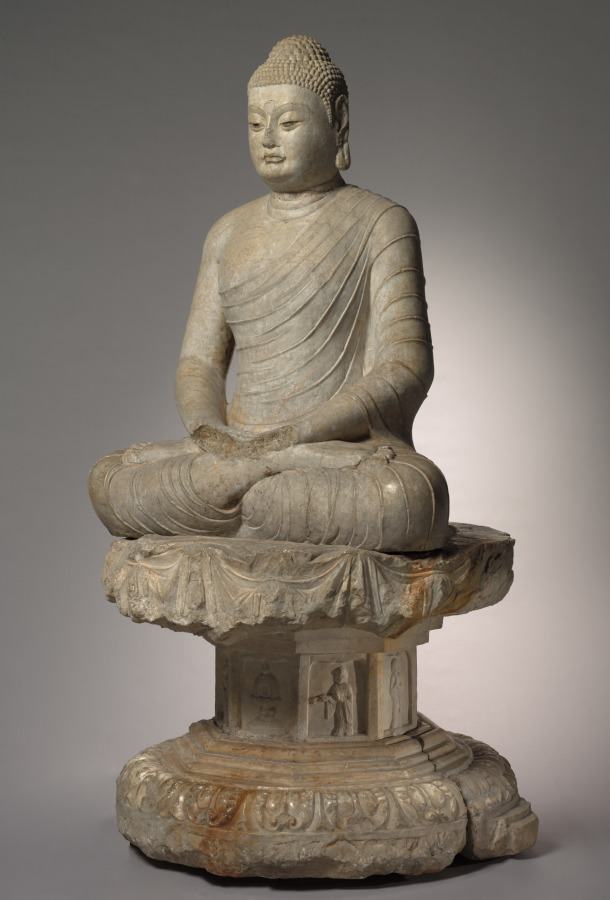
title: Seated Amitayus Buddha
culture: China, Northern Qi dynasty (550-577)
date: c. 570s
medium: marble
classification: Sculpture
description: Amitayus, the Buddha of Infinite Life, is seated in meditation on a double lotus pedestal. The pedestal was not made with the statue but the combination is faithful to the original artistic conception. The statue is an extremely rare example of a major type of Northern Qi Buddhist sculpture. The heavy, massive front highlights the sense of monumentality and the spiritual essence of the Buddha. Today the sculpture is united with a pedestal that exhibits the rich, ornate style of early Tang sculpture. It was commissioned by the Duke of Liang, Fang Xuanling (578–648), for the blessing of his second son and daughter-in-law, the Tang imperial princess of Gaoyang. The iconography and inscription suggest that it originally went with a statue, now missing, of Shakyamuni, the historical Buddha, instead of Amitayus.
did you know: The stringlike folds of the Buddha's draperies emphasize his monumental, rigidly erect torso and tubular limbs.